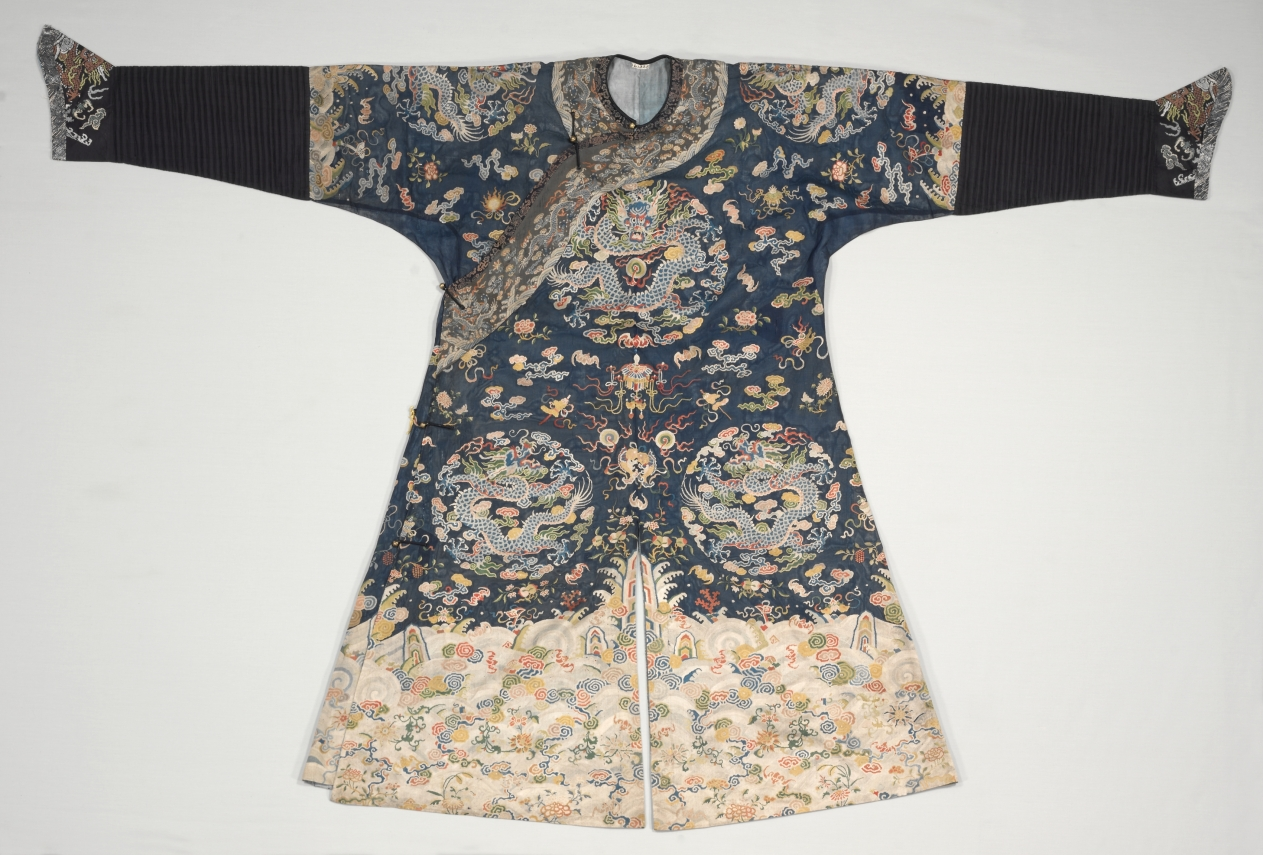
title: Mandarin Robe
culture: China, Qing dynasty (1644-1911)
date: late 1700s-early 1800s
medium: Silk; gauze weave, embroidery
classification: Garment